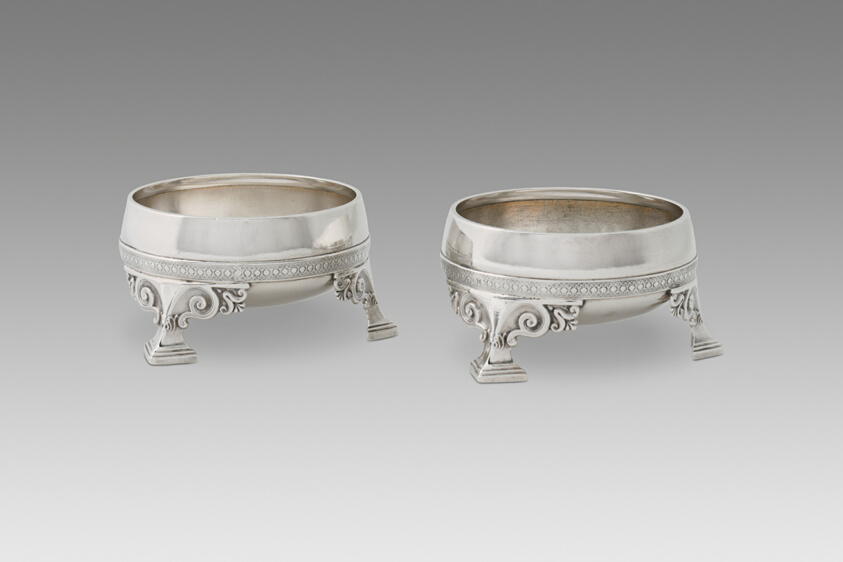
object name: Metalwork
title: Pair of Salt Dishes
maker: Tiffany and Company (American, founded 1837); New York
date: c. 1867–68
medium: Silver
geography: New York City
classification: saltcellar; silver; american decorative arts; american arts; decorative arts